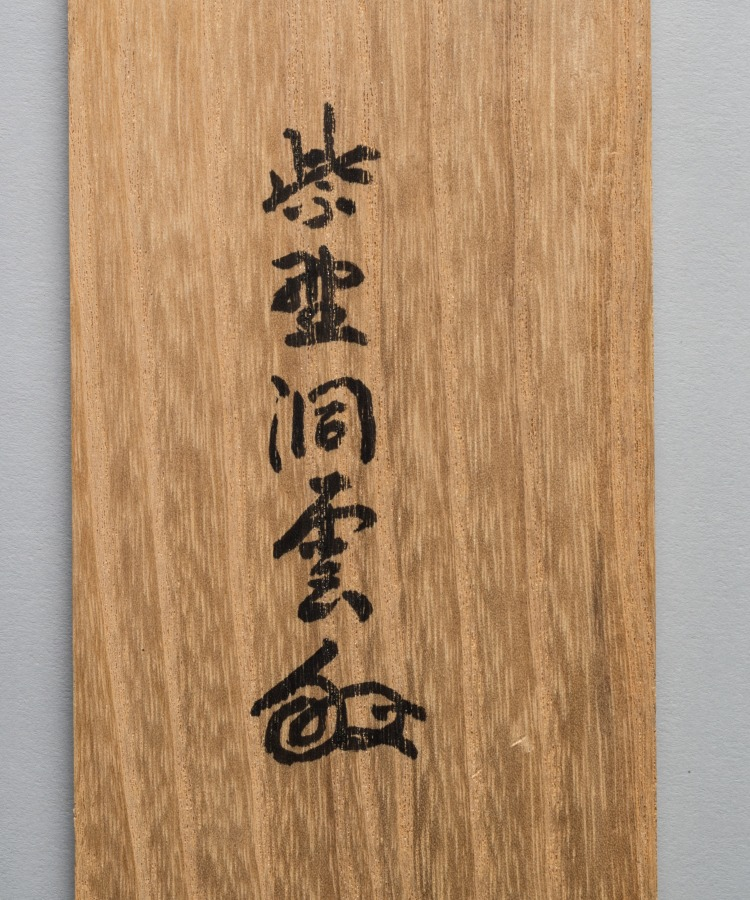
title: Vase of Flowers with Grasshopper, Marine Life, and Garden Rock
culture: Japan, Meiji period (1868–1912)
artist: Okabe Ko (Japanese)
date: late 1800s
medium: hanging scroll; ink and color on silk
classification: Painting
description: A great interest in Western scientific studies developed in Japan during the late Edo period (1615-1868) and into the Meiji era (1868-1912). One outcome of this phenomenon in the visual arts was the detailed portrayal of plant, animal, and marine life. This painting is an assemblage of objects carefully observed from nature, but not usually seen together.